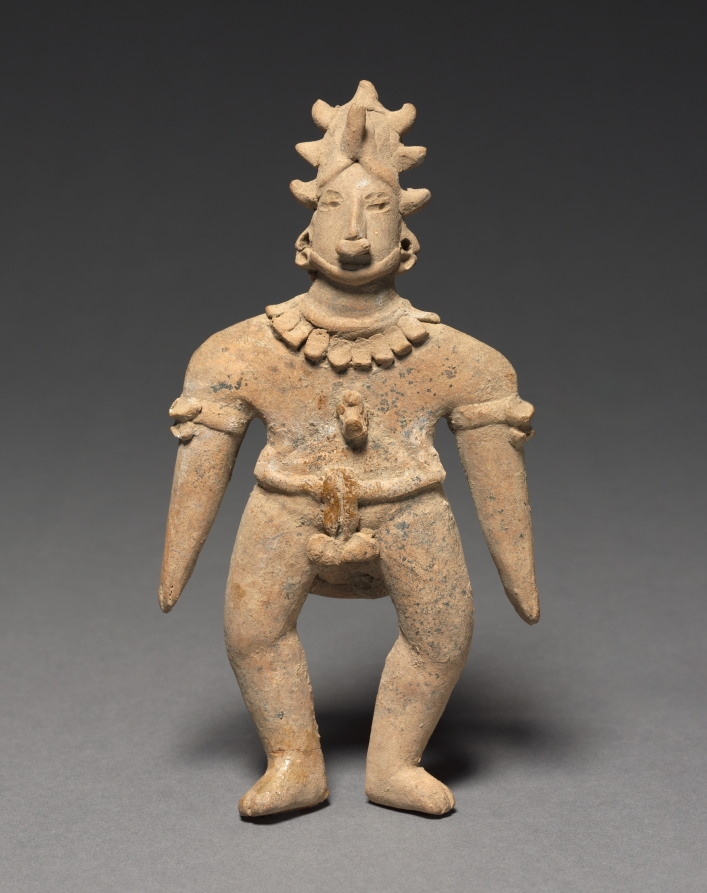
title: Flat Male Figure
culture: Mesoamerica, West Mexico, Colima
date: 200 BCE–300 CE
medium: ceramic, pigment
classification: Sculpture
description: Clay figurines were the earliest and most common art form in Mexico and other countries in the ancient Mesoamerican (Middle American) culture region. Made first by hand and later with molds, most figurines belong to the traditions of commoners, such as farmers, rather than those of elites.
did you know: Clay figurines were the earliest and most common art form in the ancient Mesoamerican culture region.